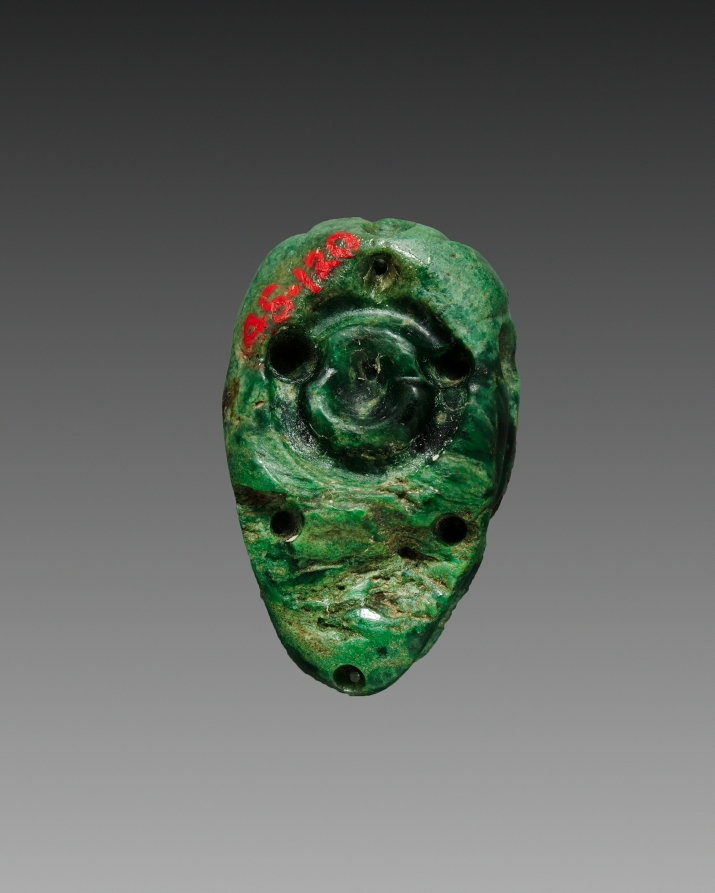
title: Head Ornament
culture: Mexico, Chichén Itzá, Maya, 7th-10th Century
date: c. 600–900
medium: jade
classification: Jade